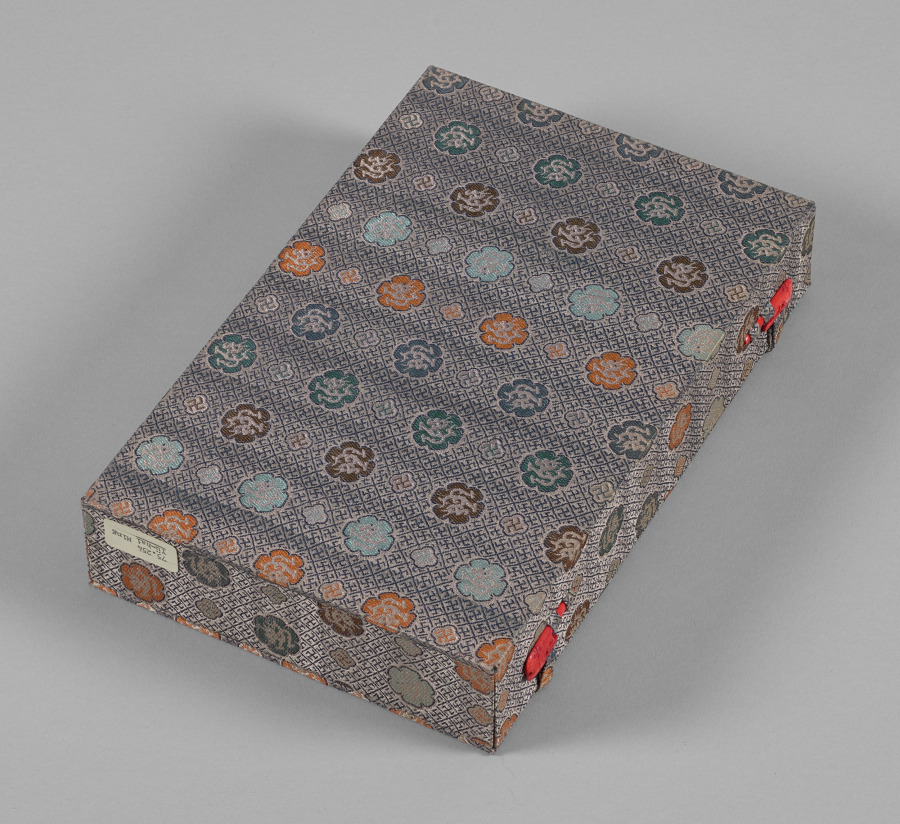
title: Yu-hai (Ocean of Jade) woodblock bound volume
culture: China, Ming dynasty (1368–1644)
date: 1368–1644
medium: woodblock-printed book with painted edges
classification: Bound Volume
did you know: When each book is rolled to form a cylinder, a landscape appears on the edges, painted in ink and washes of color.